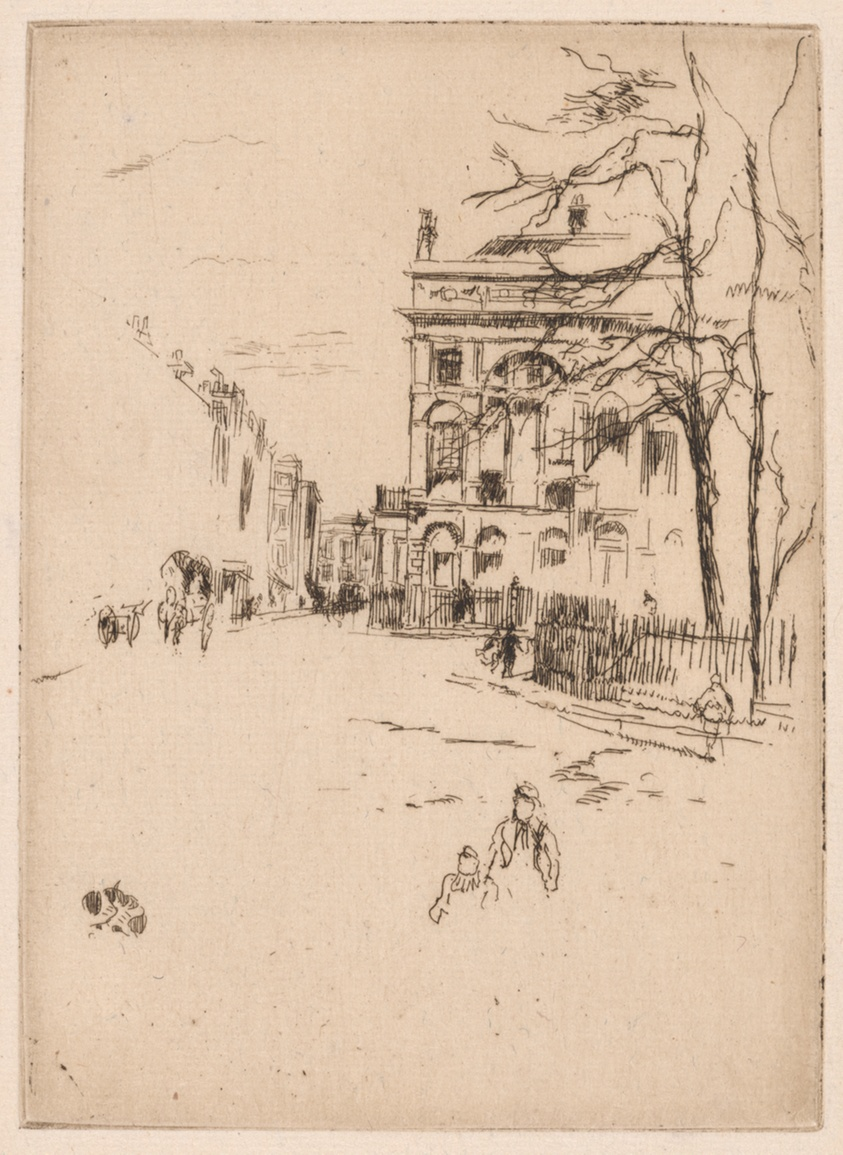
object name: Print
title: Fitzroy Square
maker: James McNeill Whistler (American, 1834-1903); printed by Frank Short (English, 1857-1945)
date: 1878/81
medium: Etching in black on ivory laid paper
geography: United States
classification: etching; paper; print; prints and drawing